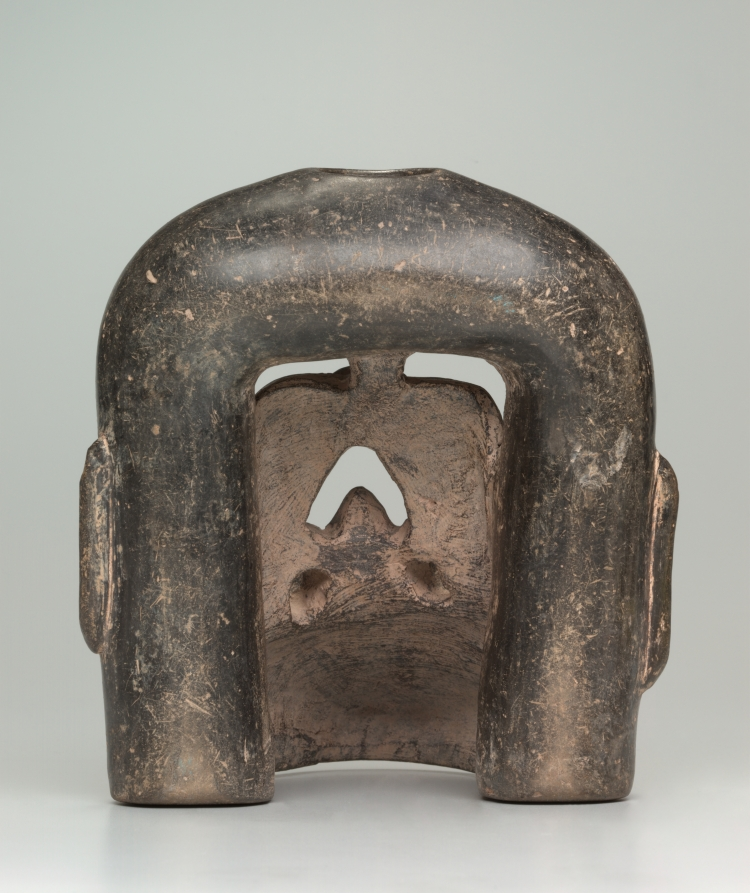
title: Vessel with Deity Mask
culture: Central Mexico (Las Bocas, Puebla?), Olmec, Formative Period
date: 1200–900 BCE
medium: ceramic, traces of pigment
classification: Ceramic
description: This unusual vessel is made of a U-shaped container and a sheet of clay modeled as a deity mask that is startling in its power: pierced eyes glare from the shadow of a muscular brow; the chin juts aggressively; and the part-bird, part-jaguar mouth opens in a shriek. This may be the face of the Olmec rain deity, the inspiration for much Olmec ritual and many accomplished works of art. The vessel may come from a grave or a buried offering.